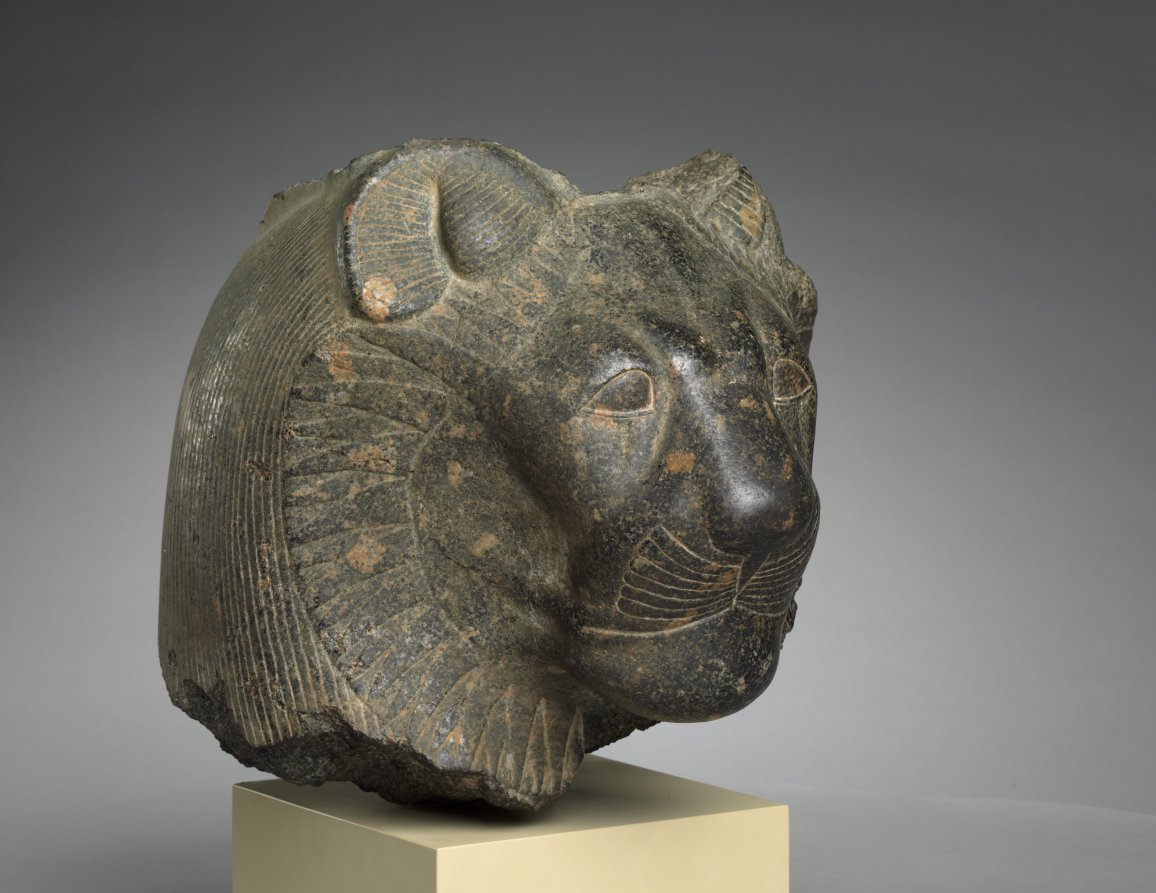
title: Head of Sekhmet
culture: Egypt, Thebes(?), New Kingdom (1540–1069 BCE), Dynasty 18, reign of Amenhotep III (1390–1352 BCE)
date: c. 1391–1353 BCE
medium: granodiorite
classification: Sculpture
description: This lioness head once belonged to a grand statue of the goddess Sekhmet, "the powerful one," probably seated and wearing a tight dress. Possibly appealing to her healing aspect, Pharaoh Amenhotep III, often described as “beloved of Sekhmet,” commissioned and dedicated hundreds of large granodiorite Sekhmet sculptures in his Theban mortuary temple. Thus, this head likely comes from Thebes, perhaps later moved across the Nile—like many such sculptures—to the temple of Mut, a related deity, at Karnak. Behind her stylized ruff, Sekhmet wears a wig, once crowned with a sun disk and uraeus, the stylized cobra symbolizing royal or divine power.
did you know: Amenhotep III may have dedicated 730 statues of Sekhmet, two for each day of the year.